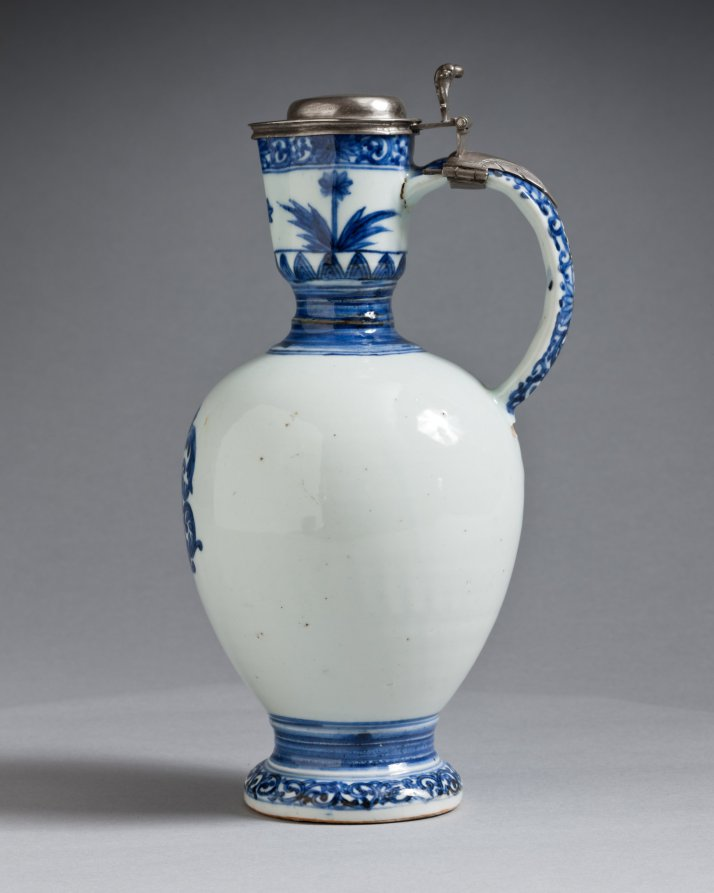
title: Jug with Silver Mounts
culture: Japan, Edo period (1615–1868)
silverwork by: Barent van Leeuwen (Dutch, 1637–1682)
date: c. 1662–76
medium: porcelain with underglaze blue decoration and silver mounts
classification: Ceramic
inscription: [on silver]: town mark for Amsterdam; lion rampant crowned (alloy mark for 0-934 silver); d (date letter for 1666), maker's mark of Barent van Leeuwen.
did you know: The coat of arms on this jug are those of the Valckenier family, active in the Dutch East India Company.